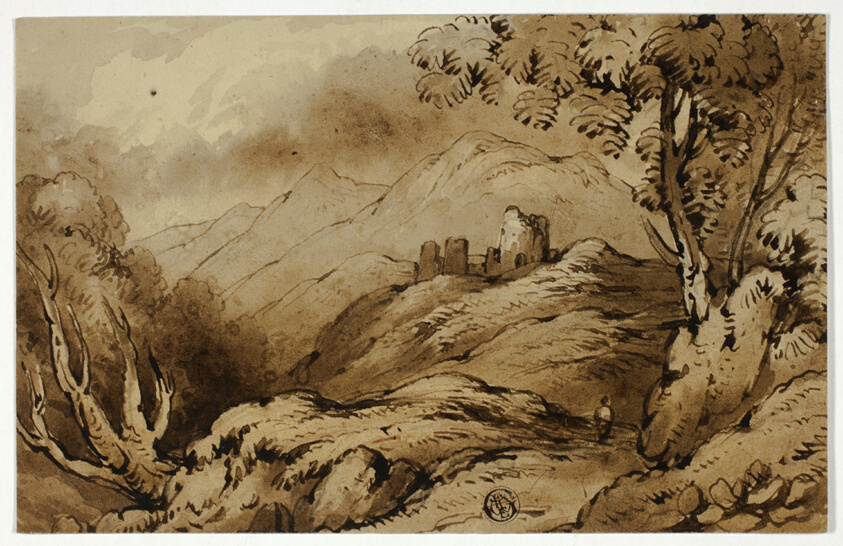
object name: Drawing and Watercolor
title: Mountainous Landscape with Ruins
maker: James Robertson (English, active 1815-1836); or Style of John Varley (English, 1778-1842)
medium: Pen and brown ink, and brush and brown wash, over graphite, on cream wove paper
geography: United Kingdom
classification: ink or chalk wash; drawings (visual works); prints and drawing